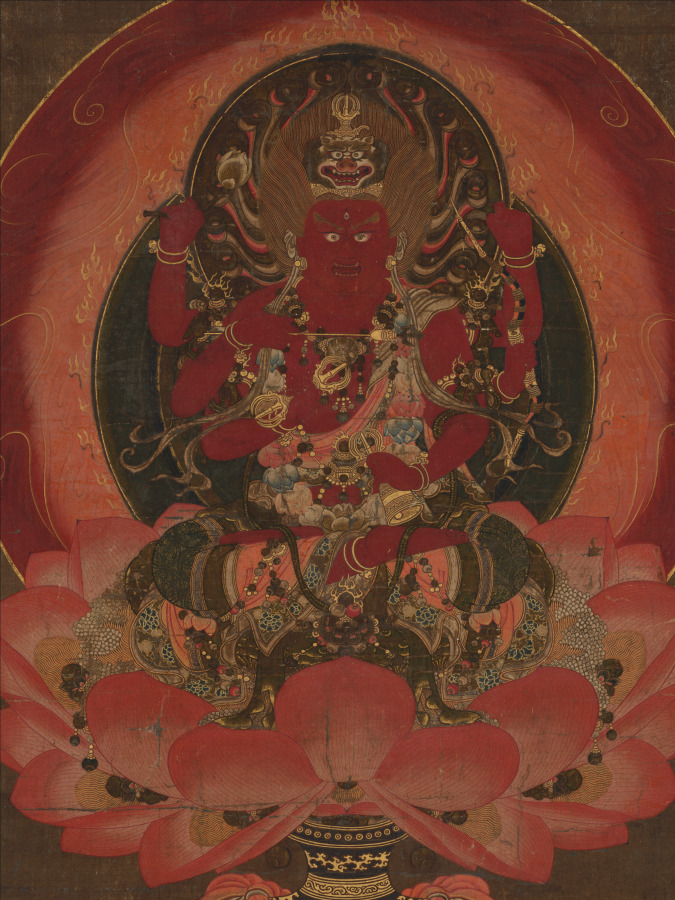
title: Aizen Myōō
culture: Japan, Kamakura period (1185–1333) to Nanbokuchō period (1336–92)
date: 1300s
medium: Hanging scroll; ink, color, and gold on silk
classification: Painting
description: Aizen Myōō is the Wisdom King of Passion. He is one of the Five Great Wisdom Kings who protect the Five Wisdom Buddhas. Each of these Buddhas represents one of the five types of wisdom characterizing a mind purified of disturbing emotions, such as desire, fear, and anger. Aizen’s body is red, and he has six arms. He has a flaming mandorla, or body halo, and sits upon a lotus supported by a vase from which flaming, wish-fulfilling jewels flow freely.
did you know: Desires are mentally deposited into the mouth of Aizen's lion so that they can be consumed.